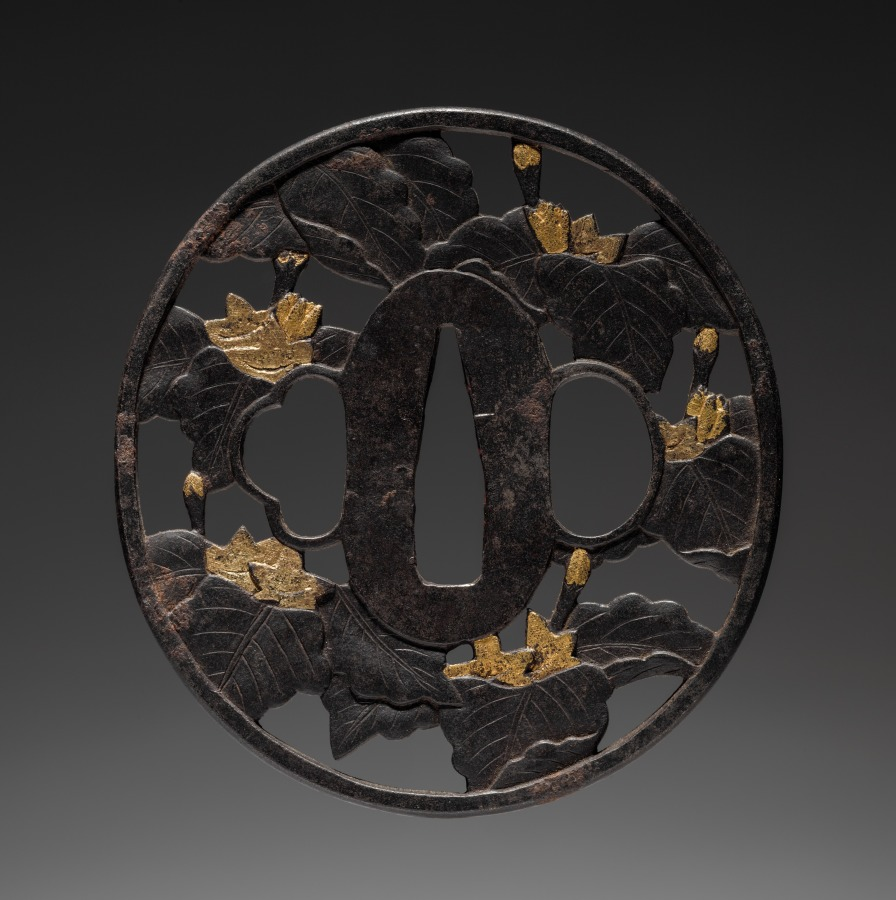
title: Sword Guard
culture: Japan, Edo period (1615–1868)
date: mid-1800s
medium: iron (Choshu type)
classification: Arms and Armor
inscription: signed "Masataka, residing at Hagi, Nagato province, made."